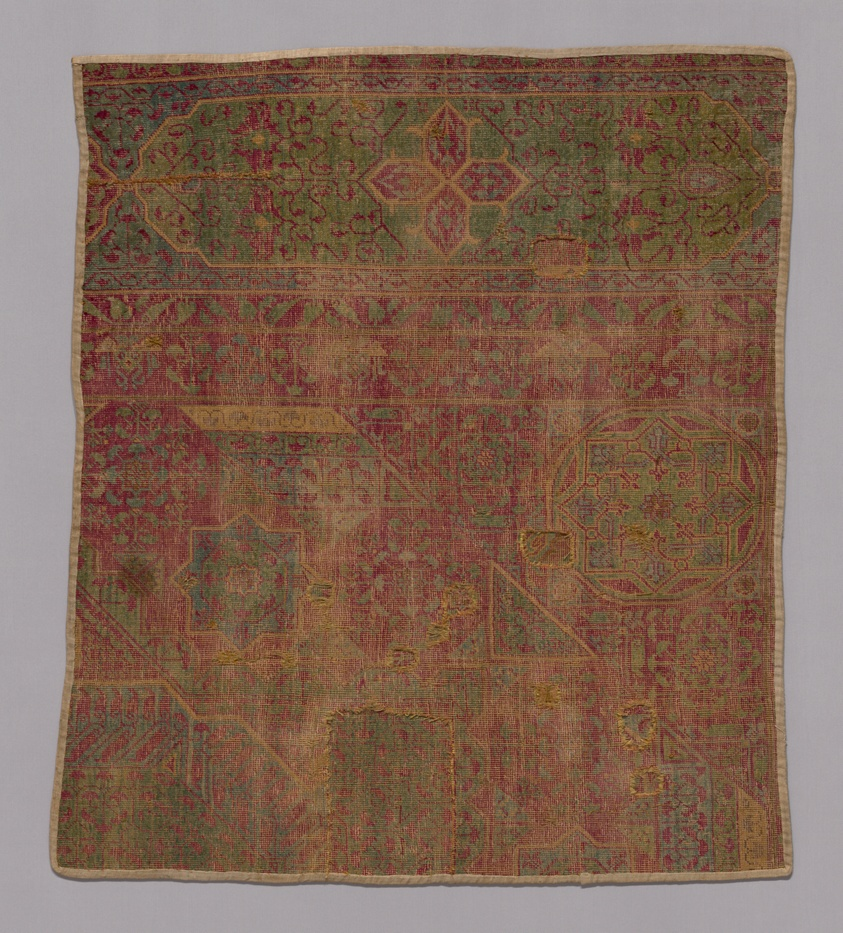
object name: Textile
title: Carpet Fragment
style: mamluk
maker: Egypt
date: Mamluk period (1250–1517), late 15th/early 16th century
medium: Wool, plain weave with supplementary wrapping wefts forming cut pile through a technique known as "Sehna knots"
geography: Egypt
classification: textile; weaving - carpet